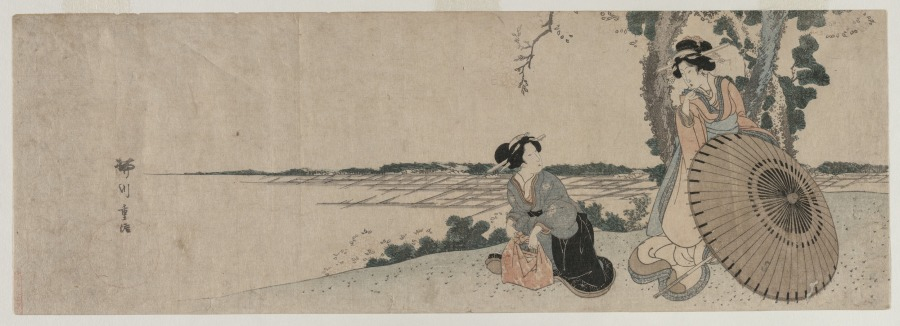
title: Two Women on a Hilltop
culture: Japan, Edo period (1615–1868)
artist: Yanagawa Shigenobu (Japanese, 1787–1832)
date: c. late 1810s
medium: color woodblock print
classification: Print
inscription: Signature: Yanagawa Shigenobu Artist Seal: Yanagawa